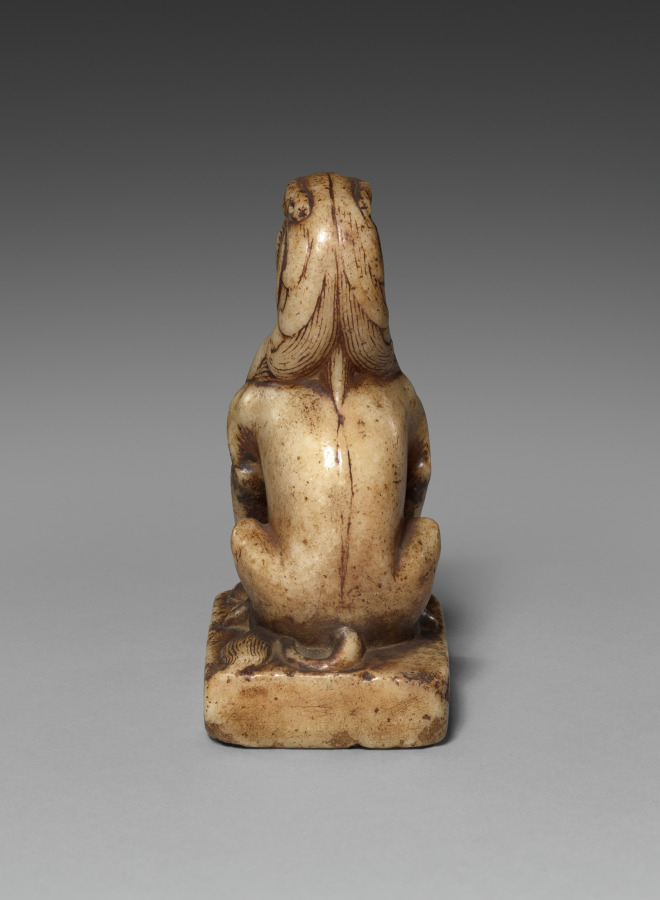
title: Lion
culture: China, Tang dynasty (618-907)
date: 618–907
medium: marble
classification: Sculpture